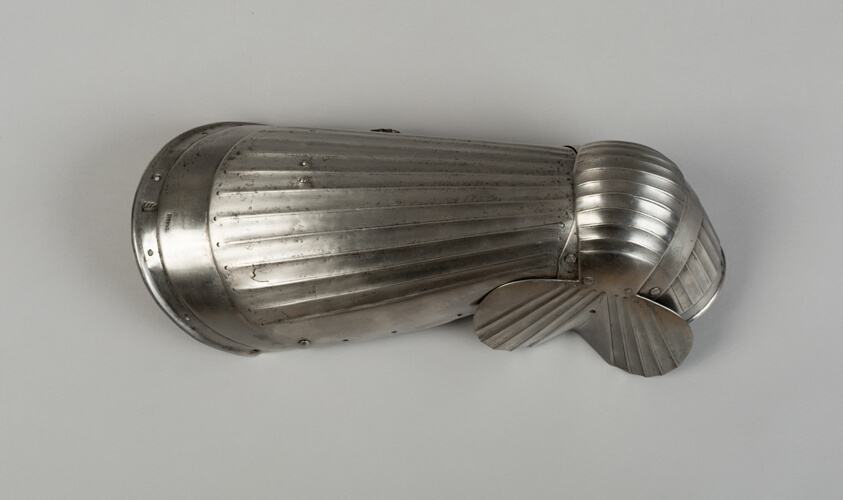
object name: Armor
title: Cuisse and Poleyn for Right Leg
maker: Southern German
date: c. 1510/20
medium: Steel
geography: Southern Germany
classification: suit-element; armor; arms and armor